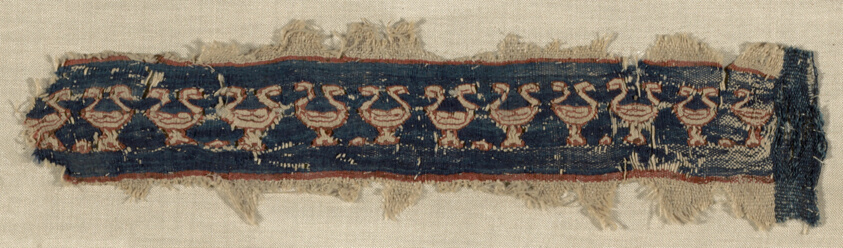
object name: Textile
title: Fragment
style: fatimid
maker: Egypt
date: Fatimid period (969–1171)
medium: Linen and silk, tapestry weave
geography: Egypt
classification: textile; weaving